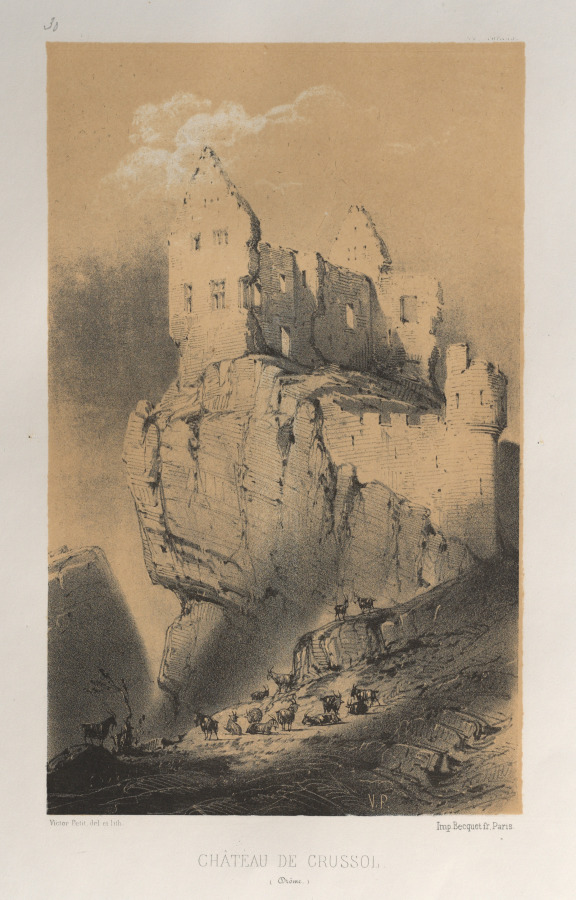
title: Architecture Pittoresque ou Monuments des xveme. Et xvieme. Siecles: Chateaux De France des XV et XVI Siecles: Pl. 30, Chateau De Crussol (Drome)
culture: France, 19th century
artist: Victor Petit (French, 1817–1874)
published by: Charles Boivin (publisher and editor); Lith de Godard a Paris (printer)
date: 1860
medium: lithograph with tint stone, from portfolio of 100 lithographs with tint stone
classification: Print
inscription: Above image, in graphite, upper left: 30